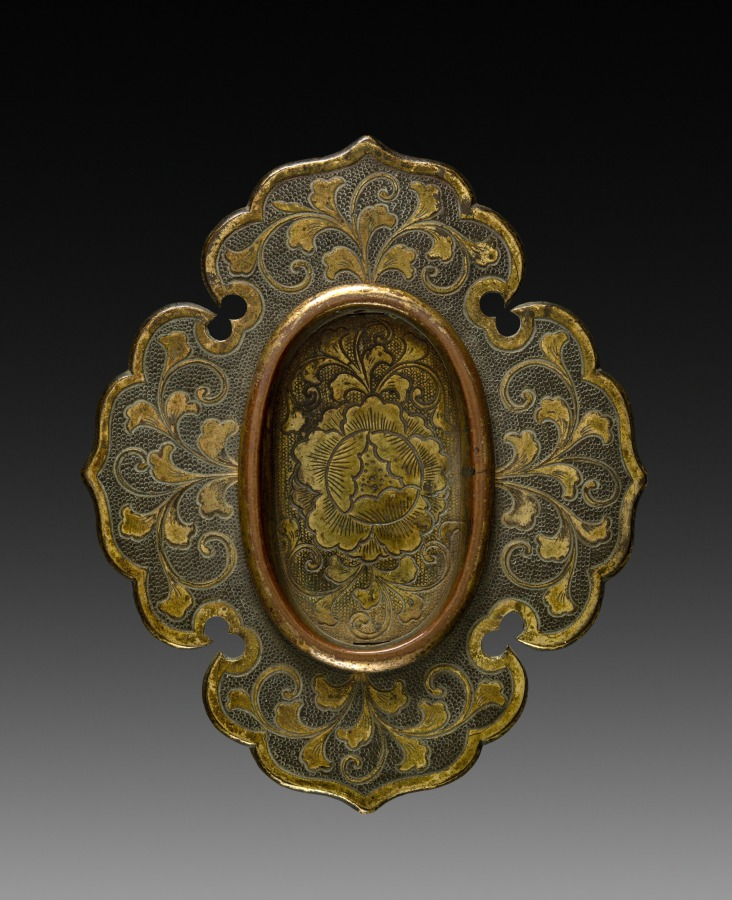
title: Door Pull (Hikite)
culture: Japan, Edo period (1615–1868)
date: early to mid-1800s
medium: gilt bronze (?)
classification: Metalwork